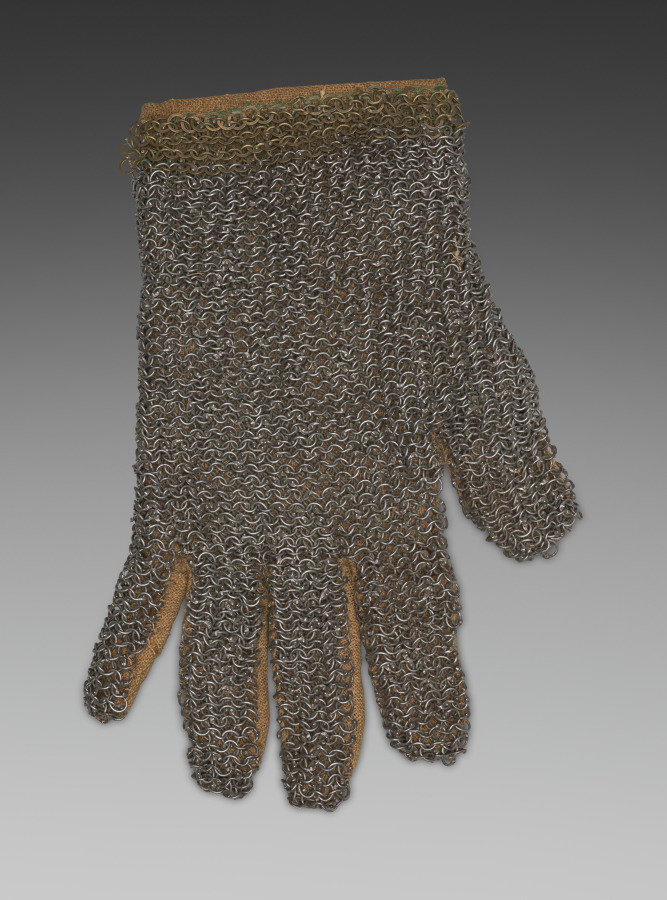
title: Gauntlet of Mail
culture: England, 16th century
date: 1500s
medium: steel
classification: Arms and Armor